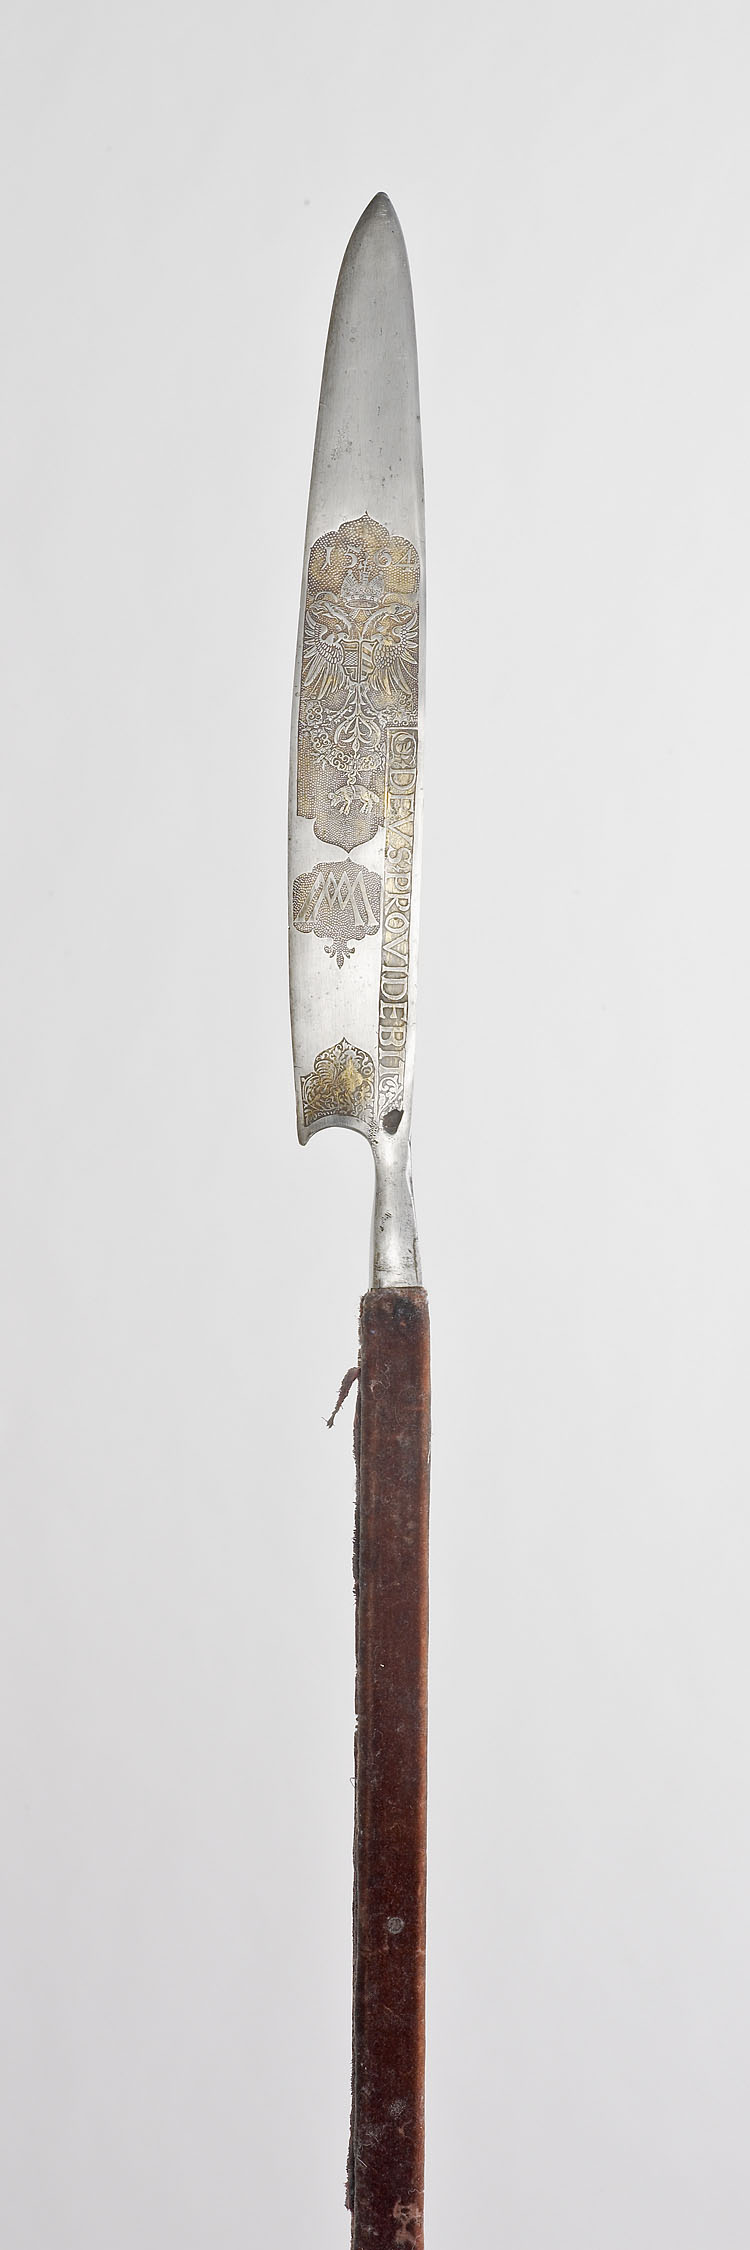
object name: Arms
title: Glaive for the Bodyguard of Emperor Maximilian II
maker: Austrian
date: 1564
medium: Steel, iron, gilding, oak, and silk textile (velvet)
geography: Austria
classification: edged weapon-staff; arms; arms and armor